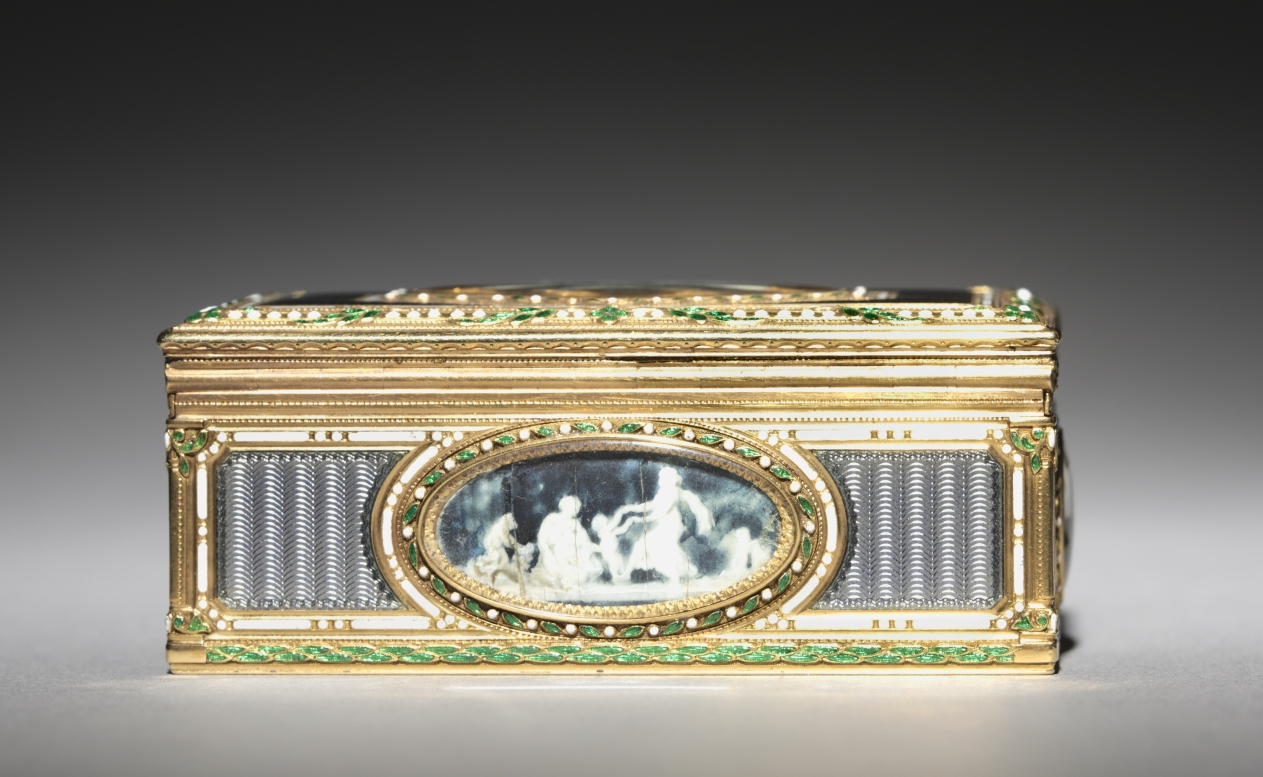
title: Snuff Box (Tabatière)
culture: France, 18th century (style of Louis XVI)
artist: François Chazeray (French)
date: 1777–78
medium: gold and enamel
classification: Metalwork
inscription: [Maker's mark of François Chazeray, master goldsmith in 1760, cover; bottom; front wall]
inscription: [Warden's mark (probably a crowned "O"), Paris, 1777-1778, cover; bottom; front wall]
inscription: [Illegible mark, bottom]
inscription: [Illegible mark, cover]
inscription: [Illegible charge mark, inside front]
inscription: [Discharge mark of Jean-Baptiste Fouache, Paris, 1774-1780, on neck at left.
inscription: [Outside of neck, modern inscription '4 (modern inscription]:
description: This box is decorated with figures of antiquity associated with love: winged cupids, dancing nymphs, and representations of the Greek goddess of love. These scenes are inspired by antique cameos, intricately carved gemstones crafted in ancient Greece and Rome. This interest in ancient iconography, symmetry, and classical compositions of gods and goddesses was characteristic of 18th-century neoclassicism.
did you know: Decorated with allegorical scenes of love, it is likely that this box was a present between lovers.